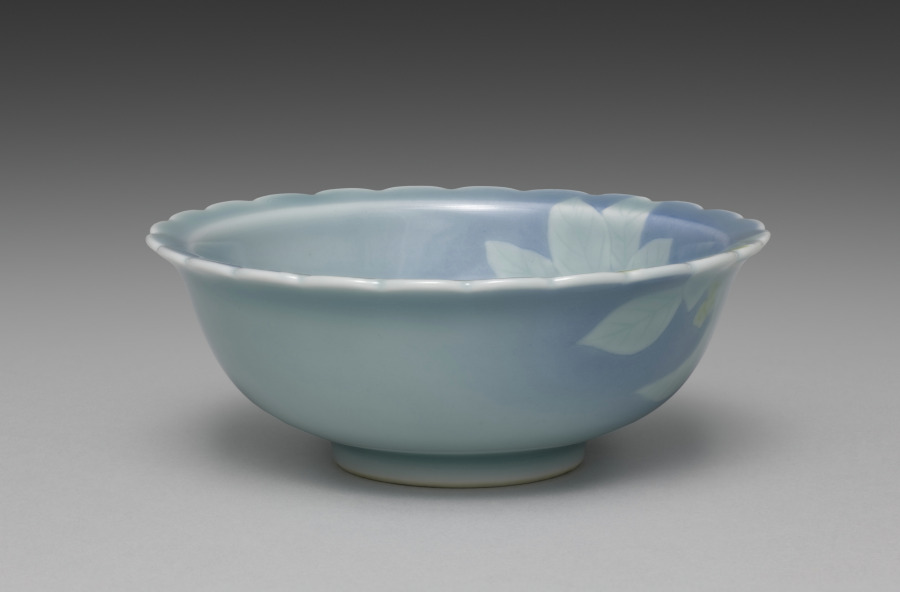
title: Dish from Dishes with Flowers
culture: Japan, Taishō period (1912–26) or Shōwa period (1926–89)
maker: Seifū Yohei IV (Japanese, 1872–1951)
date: 1914–46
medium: One from a set of five dishes; porcelain with underglaze yellow and blue glaze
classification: Ceramic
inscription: 清風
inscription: 清風造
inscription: 成山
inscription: 清風盧人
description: One can imagine a cool summer breeze when looking at this set of dishes, each shaped with a crenulated mouth and glazed with blue. Around the rim and into the basin, the bowls have low-relief designs of flowers with underglaze yellow petals; their leaves and stems show white through the glaze. On each dish, the design continues over the rim onto one side.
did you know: Seifū Yohei IV’s dishes with flowers feature underglaze yellow.